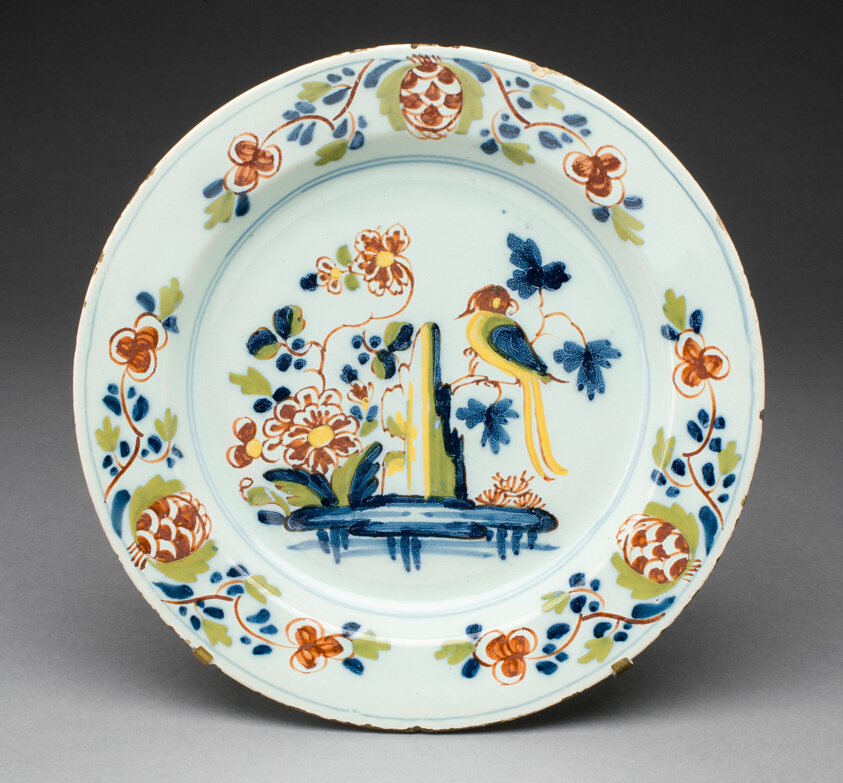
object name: Ceramics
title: Plate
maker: England, Lambeth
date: c. 1750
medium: Tin-glazed earthware (Delftware)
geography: Lambeth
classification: plate (general, dish); dish (vessel); earthenware; ceramics; european decorative arts